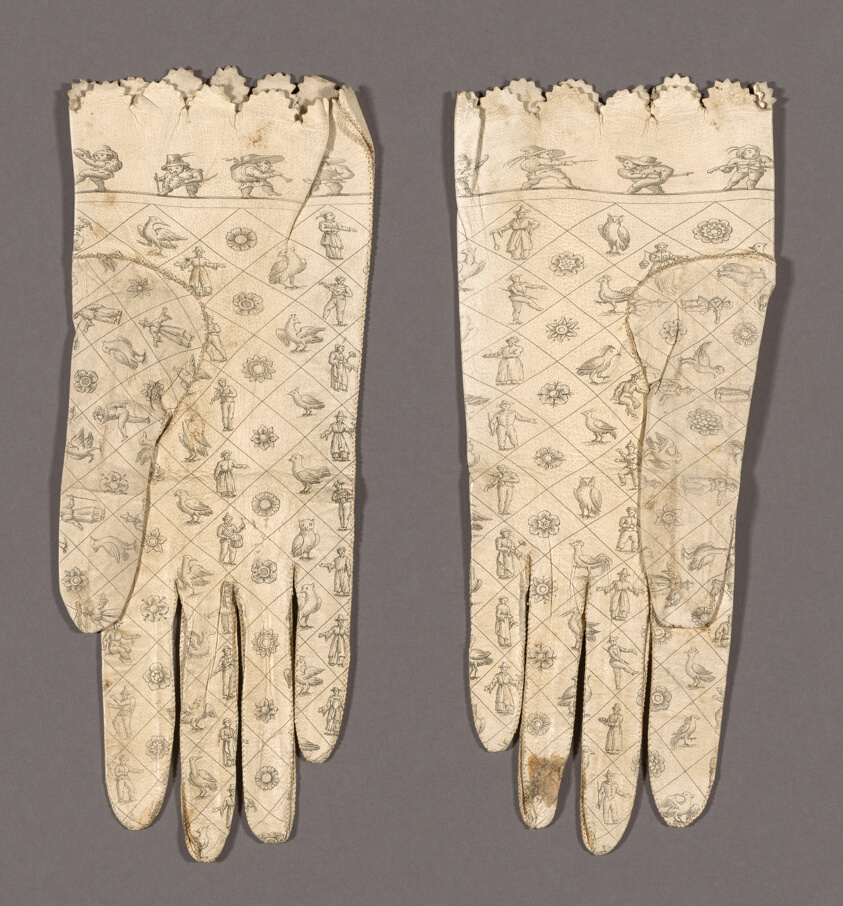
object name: Costume and Accessories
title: Pair of Gloves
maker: Designed from prints by Willhelm König, active c. 1721; Based on the work of Jacques Callot, 1592-1635; Spain, Barcelona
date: c. 1800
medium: Leather, copper plate printed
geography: Barcelona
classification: costume accessory; gloves; costume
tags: diamond shapes, animals, white (color), flowers, birds, people, musicians, scalloping